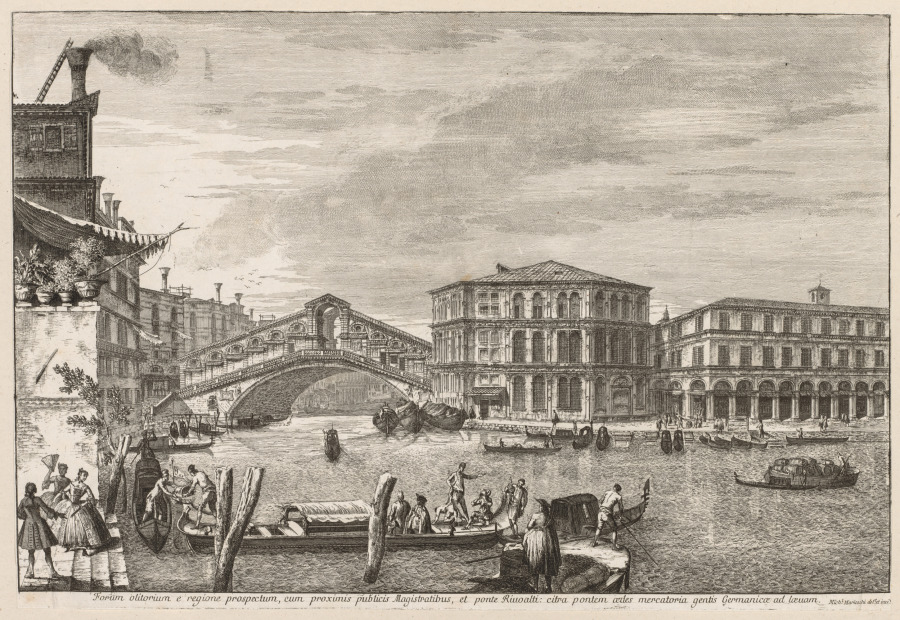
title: Views of Venice: The Bridge and Market of Rialto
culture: Italy, 18th century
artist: Michele Marieschi (Italian, 1710–1743)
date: 1741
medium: etching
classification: Print